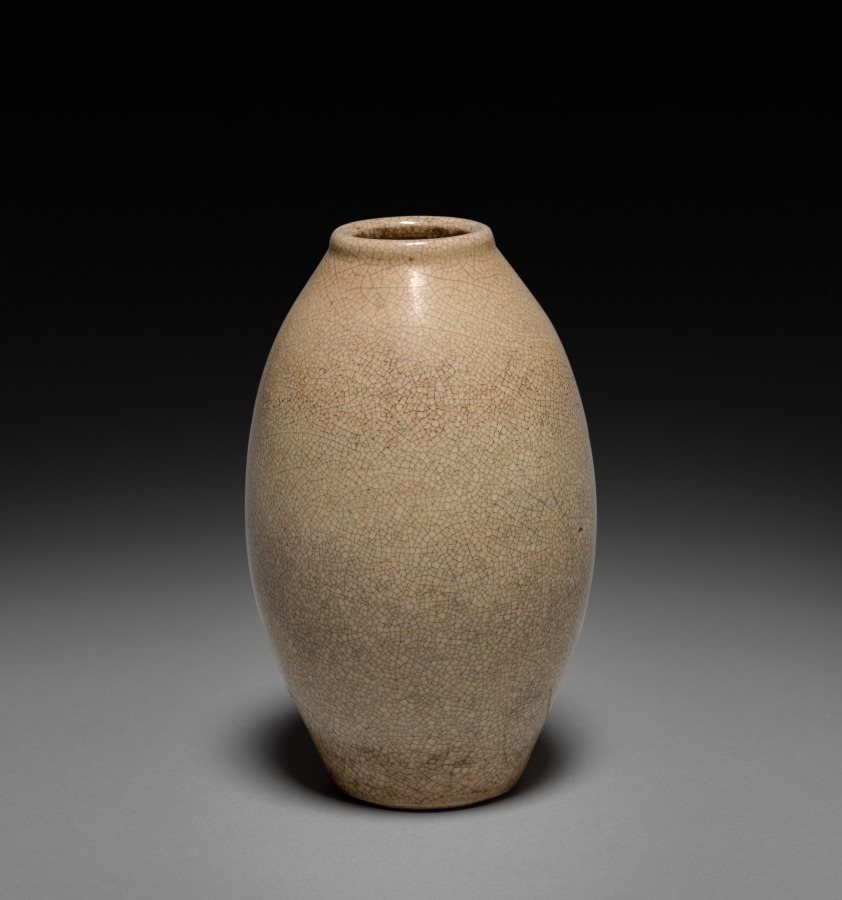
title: Vase: Dhong-ke Ware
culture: China, Ming dynasty (1368–1644)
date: 1368–1644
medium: white crackled stoneware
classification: Ceramic